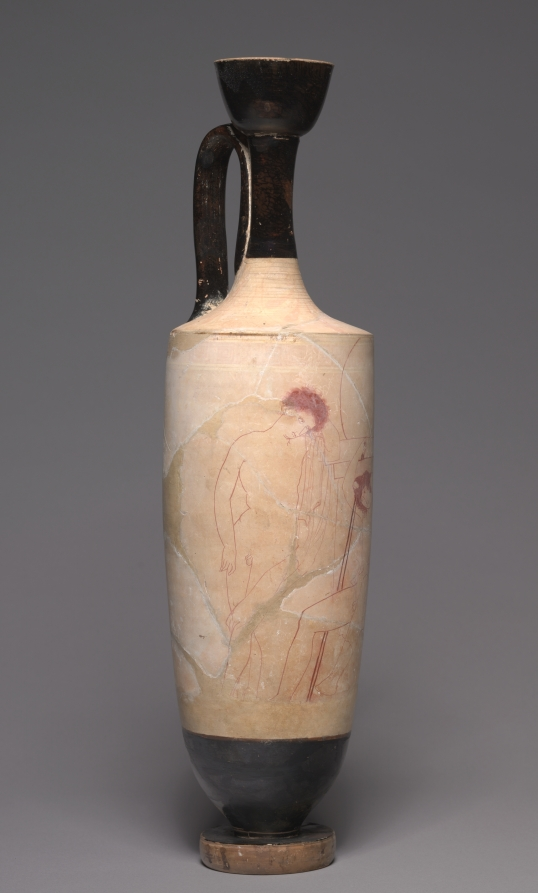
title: White-Ground Lekythos (Oil Vessel): Youths at Tomb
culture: Greek, Attic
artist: attributed to Group R (Greek, Attic, active c. 420–410 BCE)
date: c. 420–400 BCE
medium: ceramic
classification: Ceramic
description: This white-ground lekythos, a large funerary oil vessel, shows three youths at a tomb. The one seated in the center likely represents the deceased, while those standing on either side are mourners. Although much of the pigment is now lost, the strong use of line and three-quarter views have been cited by some scholars as possibly reflecting the lost works of the famous wall-painter Parrhasios.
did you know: White-ground vases give some idea of the appearance of ancient wall painting.